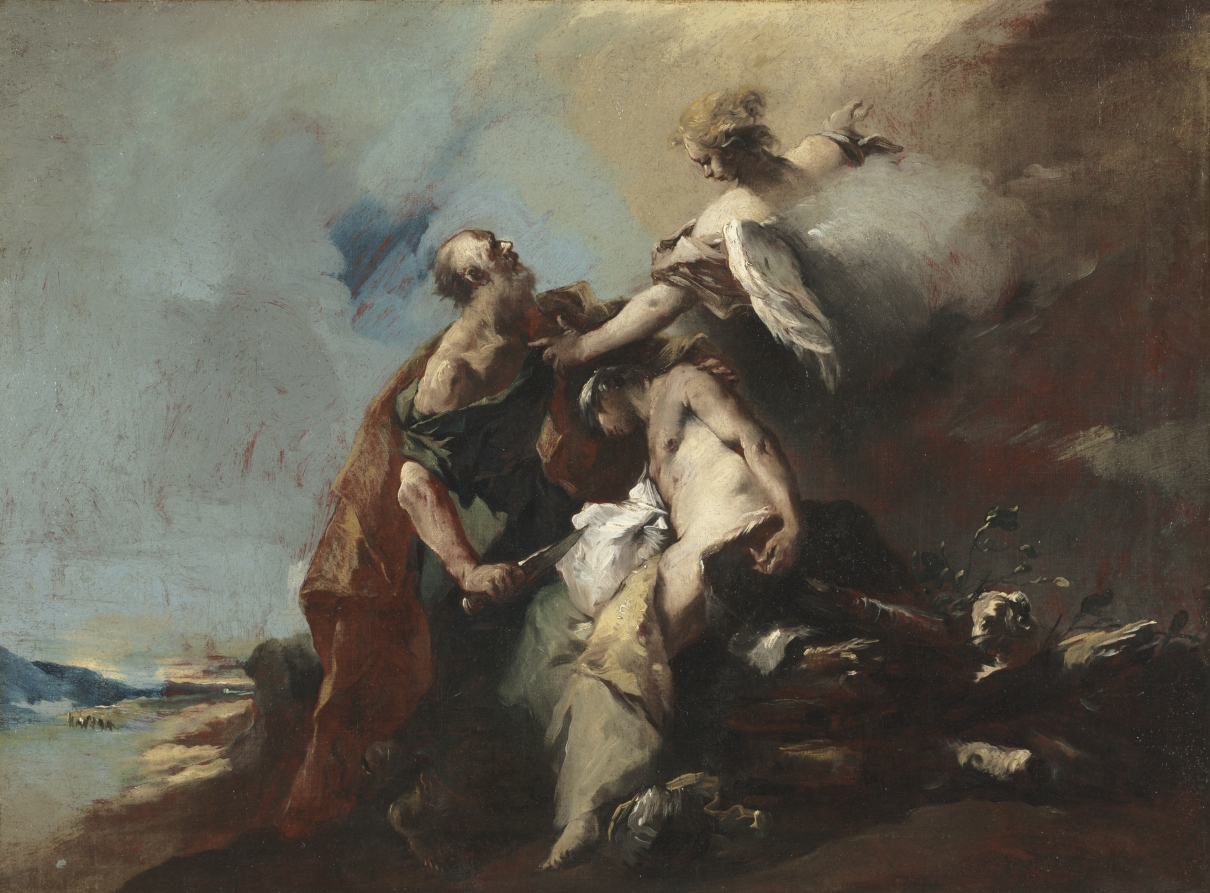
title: The Sacrifice of Isaac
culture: Italy, 18th century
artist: Francesco Guardi (Italian, 1712–1793)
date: 1750s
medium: oil on canvas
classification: Painting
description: This series of paintings primarily tells the Old Testament story of Abraham and Isaac, and each of the canvases depicts the interaction of humans and angels. In three works, angels appear to Abraham, and in one particularly dramatic canvas, an angel intercepts Abraham before he sacrifices his own son. Like another work in this series, Tobias and the Angels, the Sacrifice of Isaac is a narrative about fathers and sons as well as obedience inspired by faith.